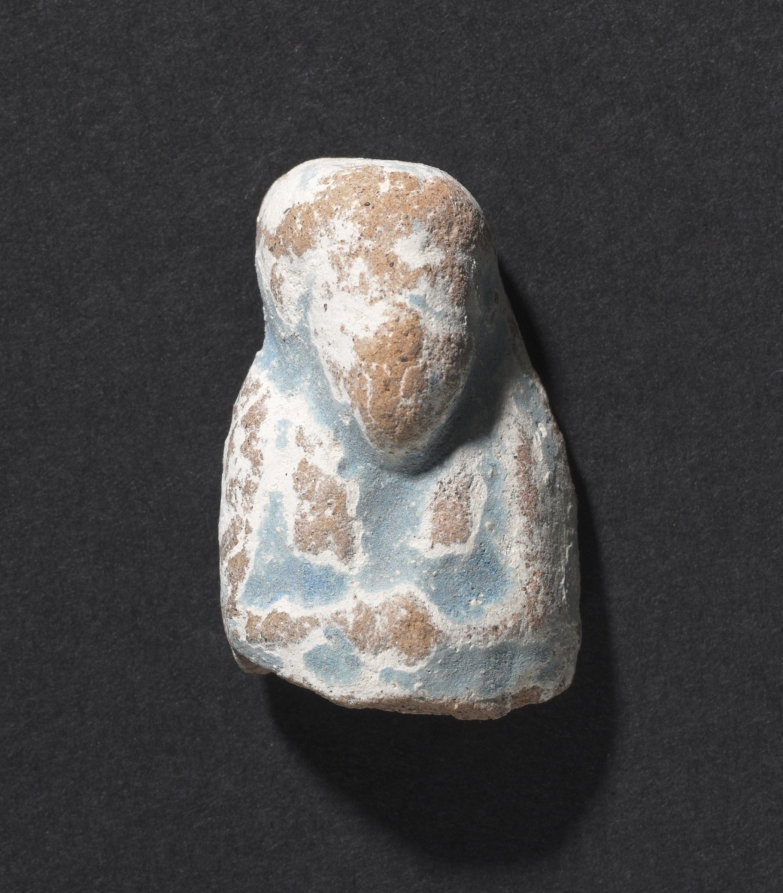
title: Shawabty of Ditamenpaankh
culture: Egypt, Late period (715–332 BCE), Dynasty 25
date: 715–656 BCE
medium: terracotta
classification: Funerary Equipment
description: High demand for shawabtys in the Late Period, a time when as many as 400 or more shawabtys were placed in the tomb with the deceased, gave rise to a specialized container for storing them: the shawabty box. This example is inscribed for the lady of the house, Ditamenpaankh, and was probably one of a pair originally made for her. The single-masted boat on the box's lid is perhaps an allusion to the pilgrimage of the deceased to the holy city of Abydos, the cult city of Osiris, king of the dead. The shawabtys inside are crude, mass-produced examples cast in an open mold. Made of terracotta, their blue paint imitates more costly shawabtys made of faience. As for the shawabty spell, it has been removed from its traditional location on the shawabty's front and relocated onto the sides of box, where it needed only to be written once, thus expediting production.